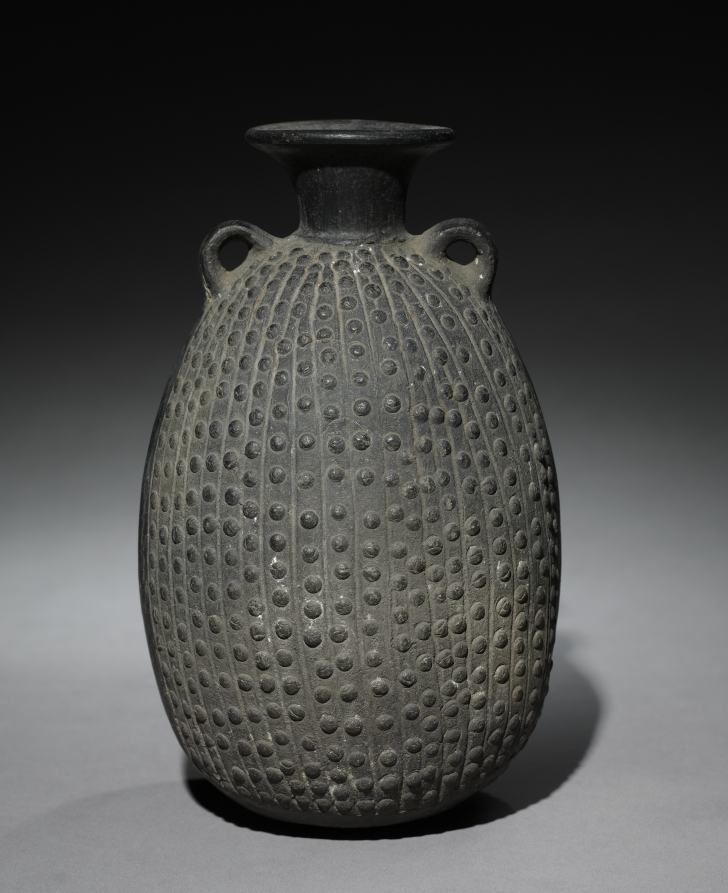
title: Darkware Vessel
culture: Peru, North Coast, Chimú style (900-1470)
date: late 1400s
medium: black ware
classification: Ceramic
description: Under the Chimú, whose empire stretched for 800 miles along the Peruvian north coast, the value of ceramics fell, perhaps because high-status vessels were made of precious metals. Accordingly, ceramics were mass-produced with molds and, rather than bearing painted scenes, often have an overall dark surface achieved by firing in a smoky atmosphere. This firing method was also used for very early Andean ceramics, including the example at the far left. We don't know whether the Chimú revived the method to venerate earlier cultures. The vessel with the stripped surface was made after the Chimú were conquered by the Inka in the late 1400s.